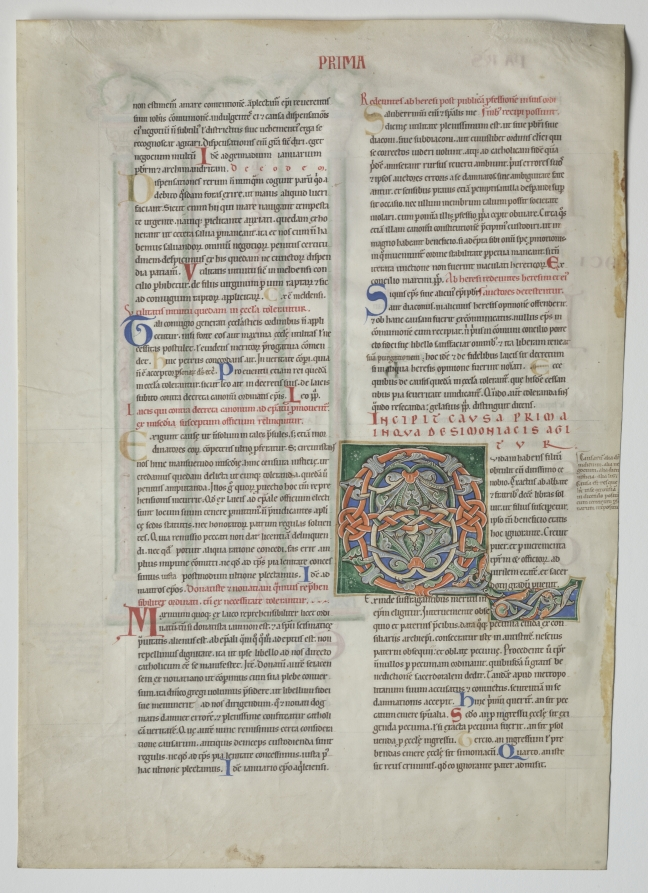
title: Single Leaf from a Decretum by Gratian: Decorated Initial Q[uidam habens filium obtulit]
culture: France, Burgundy, Archdiocese of Sens, Abbey of Pontigny, 12th century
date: c. 1160–1165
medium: ink and tempera on vellum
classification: Manuscript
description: This leaf was excised from a copy of the handbook of church law known as the Decretum written by Gratian, an Italian Camaldolese monk active in Bologna from about 1130 to 1140. The focus of the leaf is a large decorated letter Q with spiraling lotus petals introducing the first Causa, or case of law. The text begins, "A man having a son offered him to a very wealthy cloister." This case concerns the definition of simony (making profit from sacred things). The style of the illumination and the script date the leaf to between 1160 and 1165. In November 1164, Thomas Becket, Archbishop of Canterbury, took refuge at Pontigny as a result of his conflict with King Henry II of England. During his stay, Becket immersed himself in the study of church law, as evidenced by his later use of citations from the Decretum. This leaf could have been part of the original manuscript Becket consulted. The volume was later dismembered following the suppression of the monastery during the French Revolution in the late 1700s.